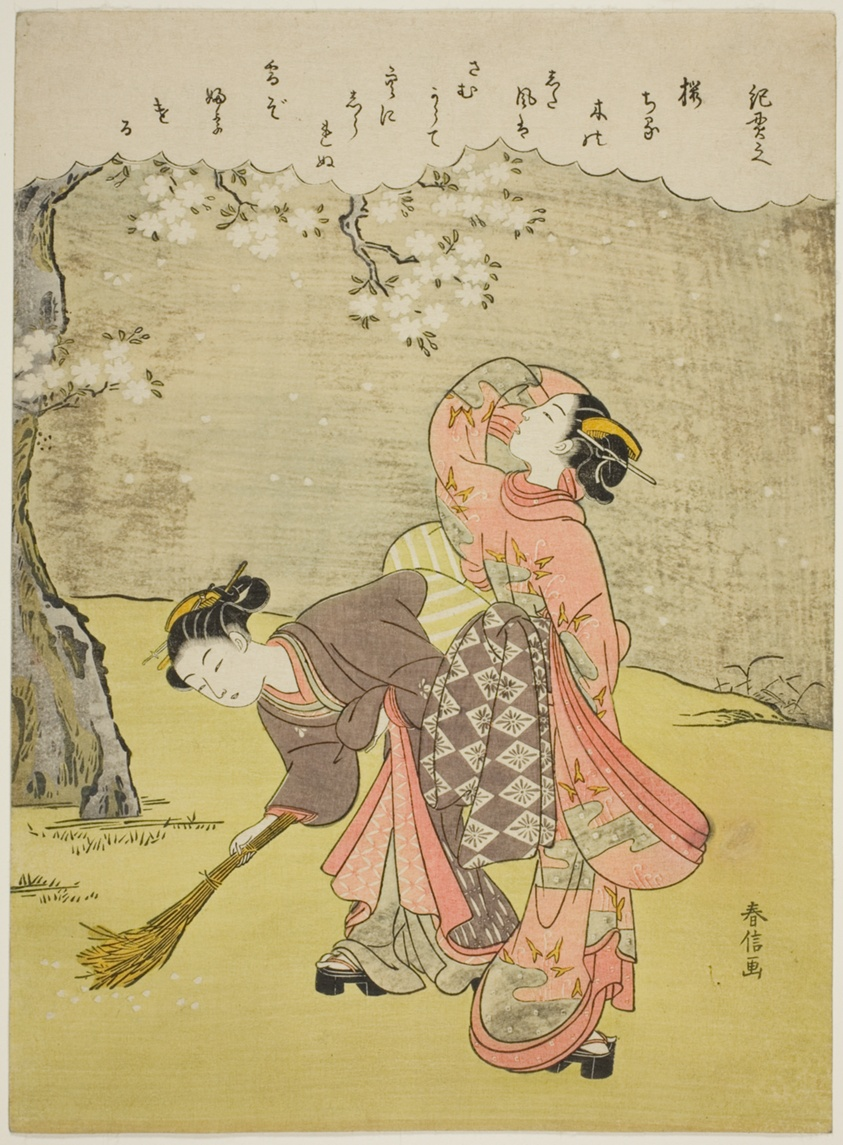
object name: Print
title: Poem by Ki no Tsurayuki, from an untitled series of Thirty-Six Immortal Poets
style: Japanese (culture or style)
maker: Suzuki Harunobu 鈴木 春信; Japanese, 1725 (?)-1770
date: c. 1767/68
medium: Color woodblock print; chuban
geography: Japan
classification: woodblock print; print; asian art